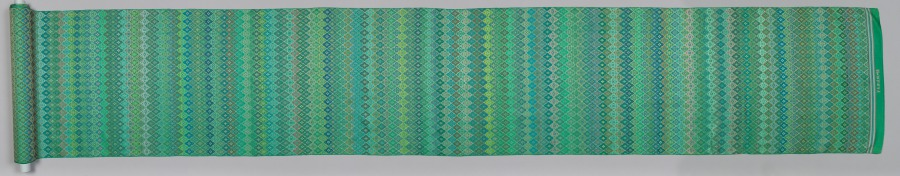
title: Woven Loom Piece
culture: China, Suzhou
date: 1800–1825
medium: lampas, silk and gold thread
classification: Textile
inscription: Within the selvage's green band is an inscription indicating that the piece was woven at the Imperial Textile Works of Suzhou and giving the name of the superintendent of the works.